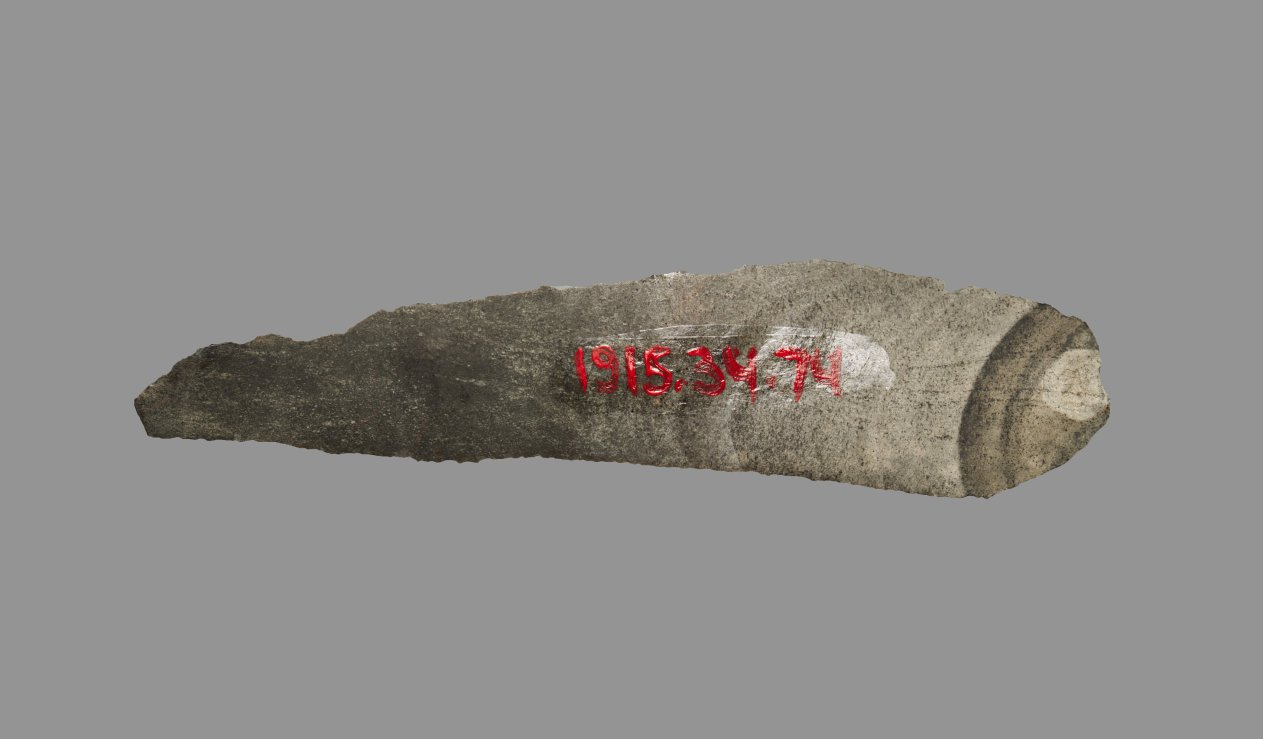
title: Sickle Blade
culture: Egypt, Middle Kingdom (2040–1648 BCE), Dynasty 12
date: 1980–1801 BCE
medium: flint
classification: Implements